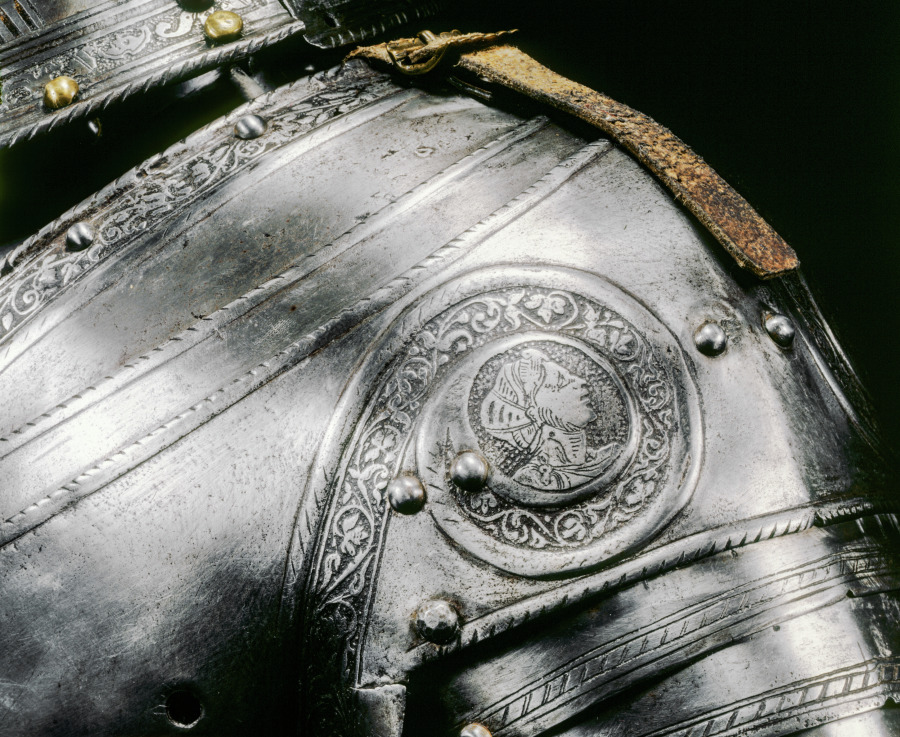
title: Half-Suit of Armor for the Field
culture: North Italy, Brescia (?), 16th century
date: c. 1575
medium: steel with etched decorative bands and roundels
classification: Arms and Armor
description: Decoration was critical to fine armor, and etching was the most commonly used technique. Here, the bands along the borders are etched. On the breastplate, pauldrons (shoulder guards), and tassets (hip and upper leg guards), etched medallions enclose profile busts reminiscent of ancient Roman portraits. The lance rest on the breastplate indicates that this half-suit was once part of a complete field armor for man and horse. The etching technique used for armor was developed in the late 1400s. The metal surface was first coated with an acid-resistant substance, such as wax or varnish. An etching needle was then used to scratch a design into the surface. The exposed areas were then treated with an acid that would "bite" or etch the lines into the metal. When the coating was removed, the etched design was blackened for contrast.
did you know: This is an example of raised field etching where the design stands out in slight relief from the background.